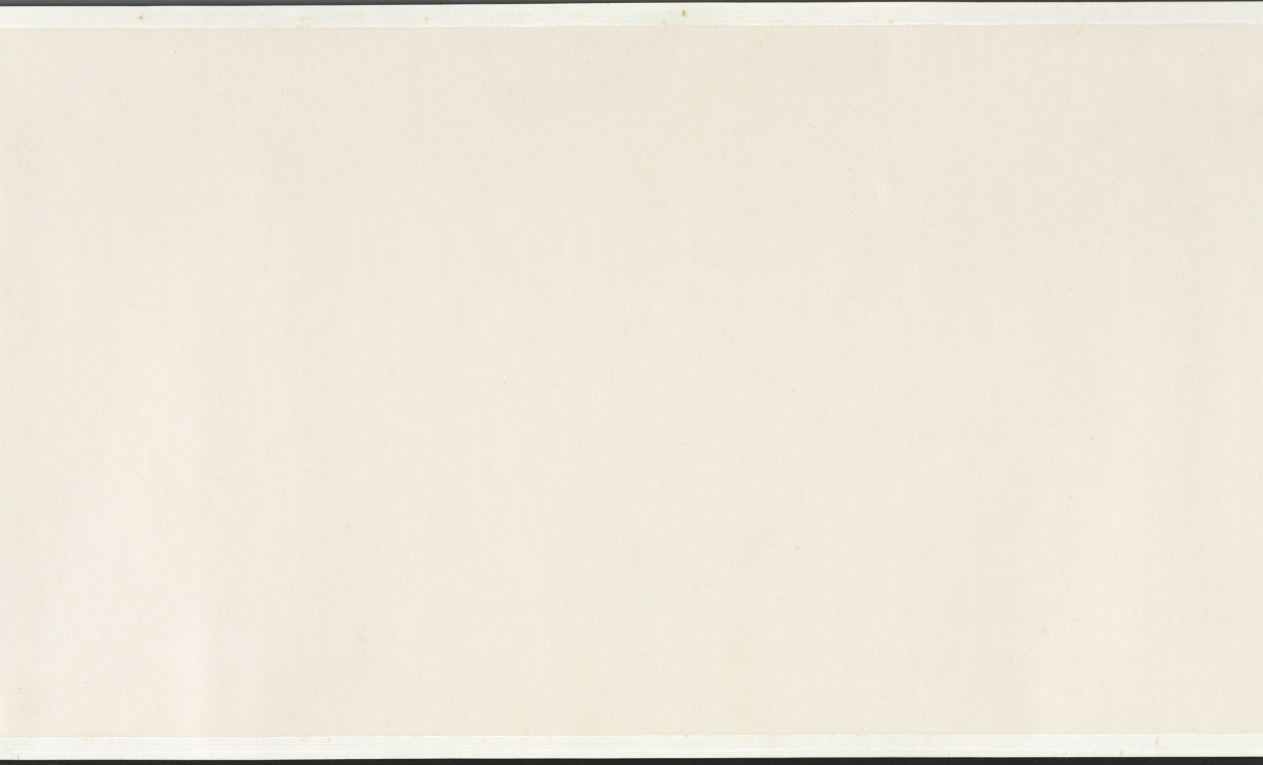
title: Buddha's Conversion of Five Bhiksu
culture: China, Yuan dynasty (1271–1368)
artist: Li Sheng (Chinese, active c. 1324–after 1375)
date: mid-1300s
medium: handscroll; ink on paper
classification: Painting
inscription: 紫篔生李升識 [印] 李氏子雲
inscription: 4 colophons and 12 additional seals: The "Heart" Sutra (Maha Prajnaparamita) text written by Wu Yuqing 吳餘慶 (active early 1400s); 2 seals of Xu Qianxue 徐乾學 (1631–1694); 3 colophons, one dated 1929 and two dated 1936, and 9 seals of Wu Hufan 吳湖帆 (1894–1968); 1 colophon, dated 1932, of Chen Dingshan; 1 seal unidentified.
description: This episode stems from the life of the historical Buddha, who, after his enlightenment, was initially hesitant about preaching his own doctrine. After much personal deliberation and prodding by deities, he finally relented. The first converts were the five guards who served him when he was still a prince. For Li Sheng, this is the pretext of the painting, which moves from the interaction of the bhiksu with the Buddha to a broader awareness of the vast surroundings of the scene.